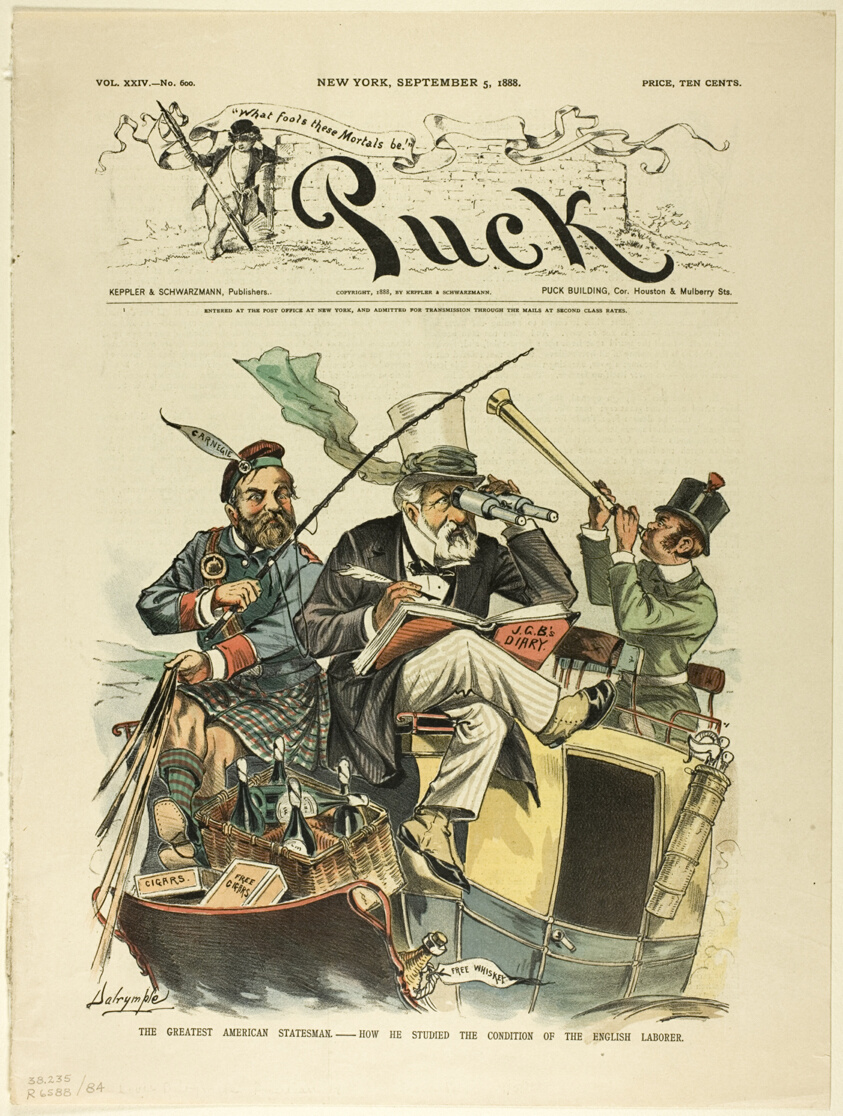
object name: Print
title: The Great American Statesman, Puck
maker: Louis Dalrymple (American, 1865-1905)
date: published September 5, 1883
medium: Color lithograph on newsprint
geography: United States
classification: lithograph; print; prints and drawing